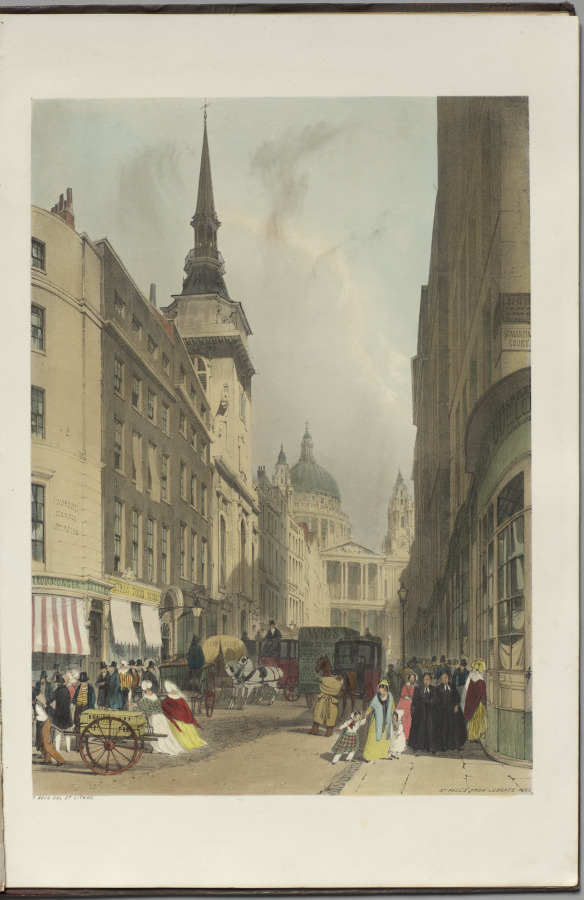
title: London As It Is: St. Paul's, from Ludgate Hill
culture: England, 19th century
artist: Thomas Shotter Boys (British, 1803–1874)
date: 1842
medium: lithograph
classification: Bound Volume